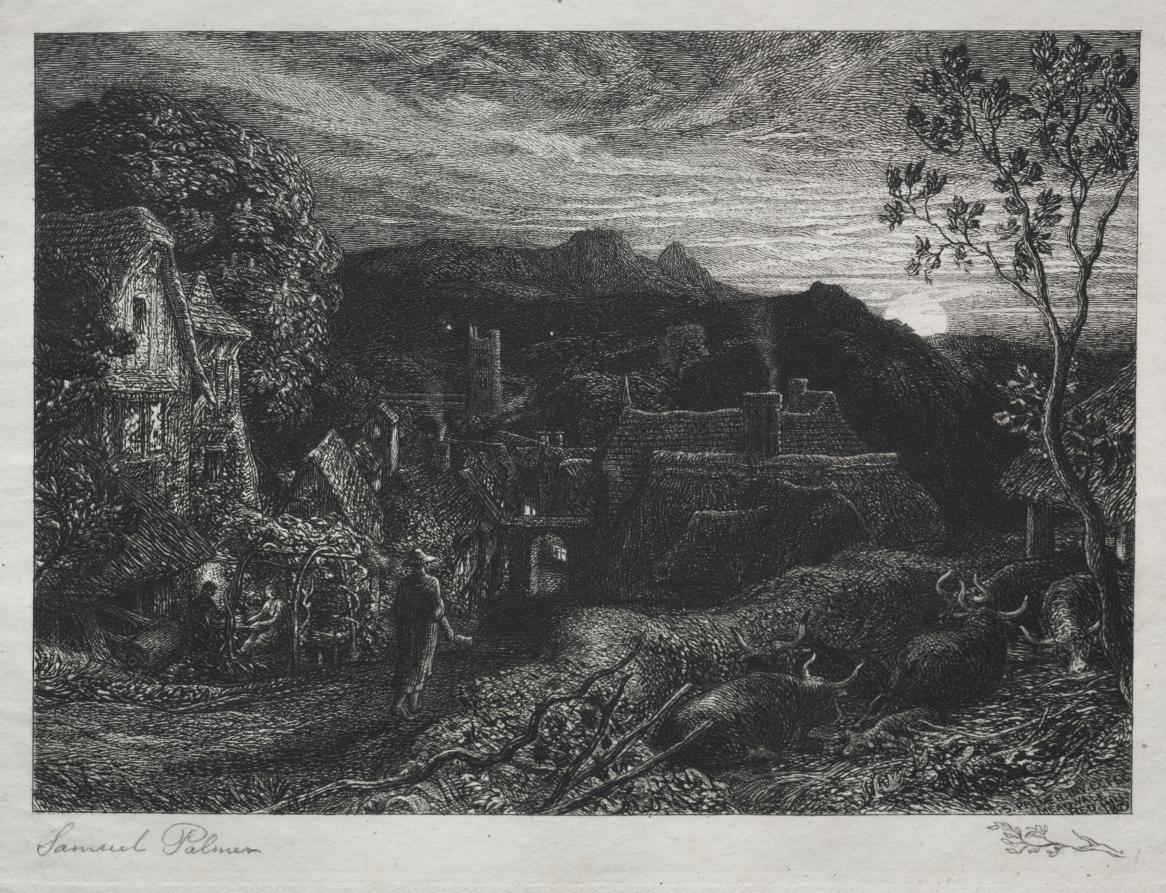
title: The Bellman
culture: England, 19th century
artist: Samuel Palmer (British, 1805–1881)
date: 1879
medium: etching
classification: Print